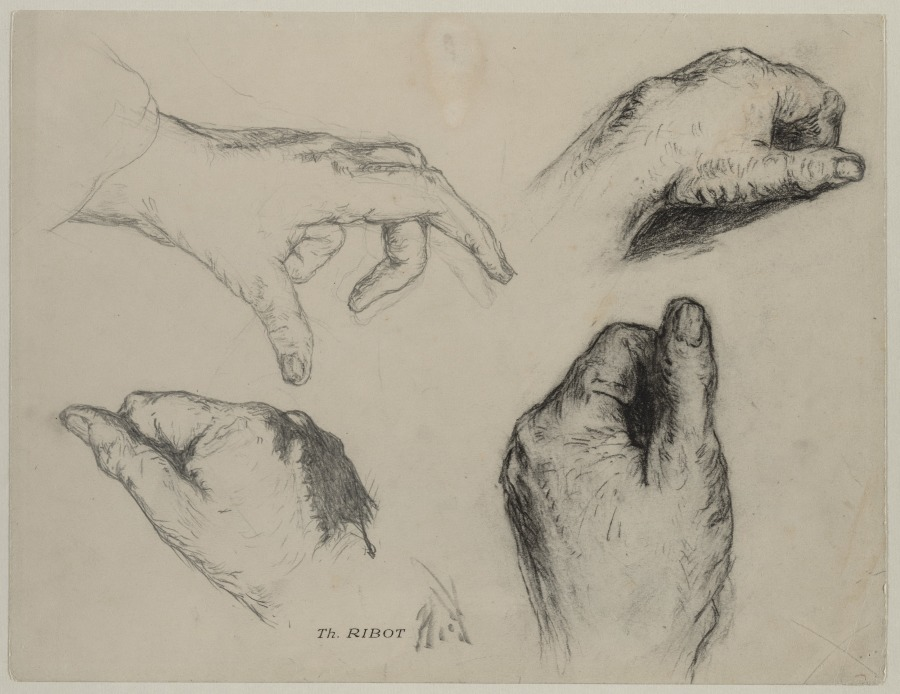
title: Study of Hands (recto)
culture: France, 19th century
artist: Théodule Ribot (French, 1823–1891)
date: 1800s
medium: black chalk and graphite (recto)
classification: Drawing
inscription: inscribed in black ink, lower center; "Th. Ribot (estate stamp)